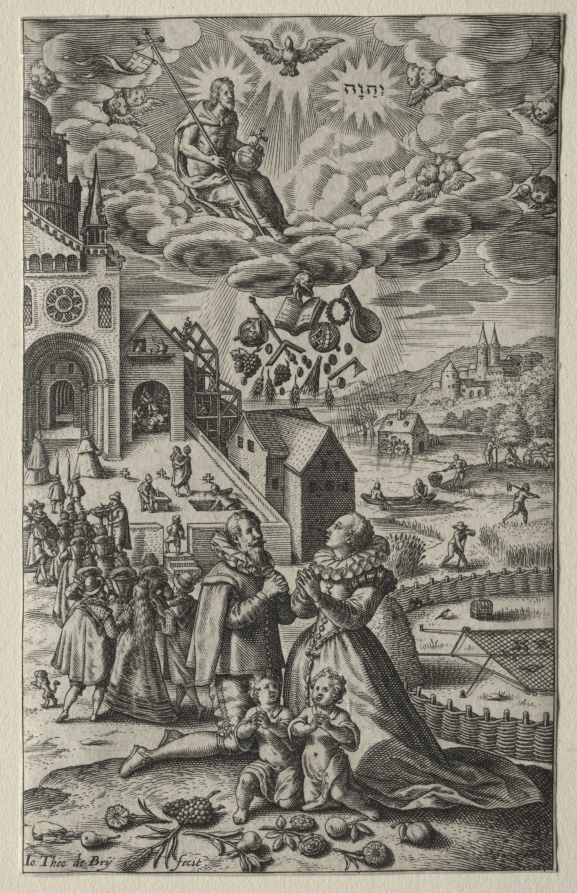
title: Prayer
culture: Flanders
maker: Johann Theodor de Bry (German, 1561–1623)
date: 1580–1623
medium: engraving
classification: Print